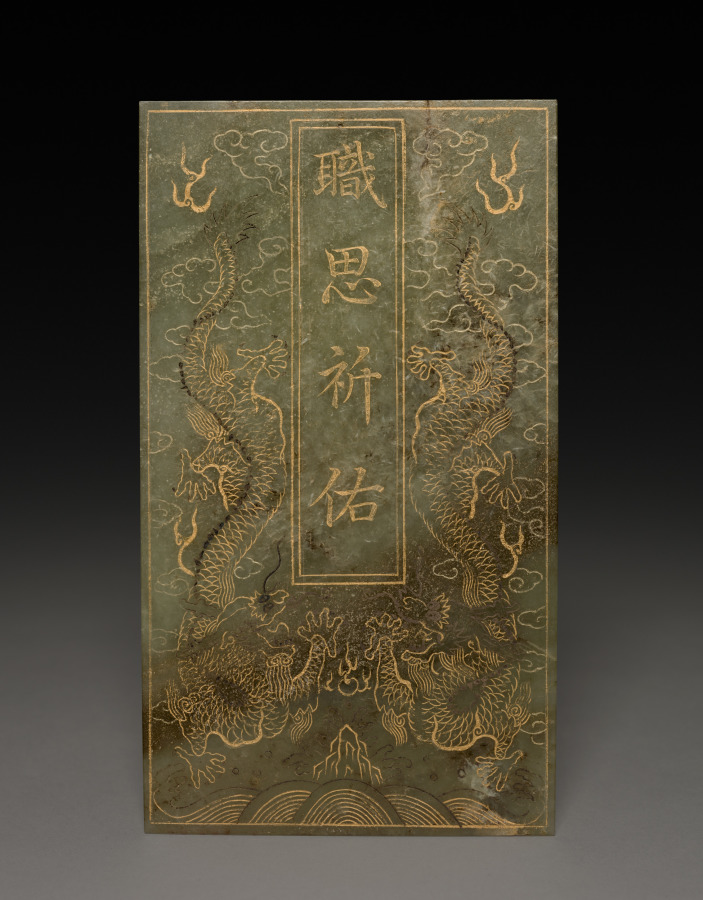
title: Box with Six Jade Tablets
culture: China, Qing dynasty (1644–1911), Qianlong reign (1736–95)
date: 1778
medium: Tablets: jade; box: pressed sizing on wood painted with lacquer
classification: Jade